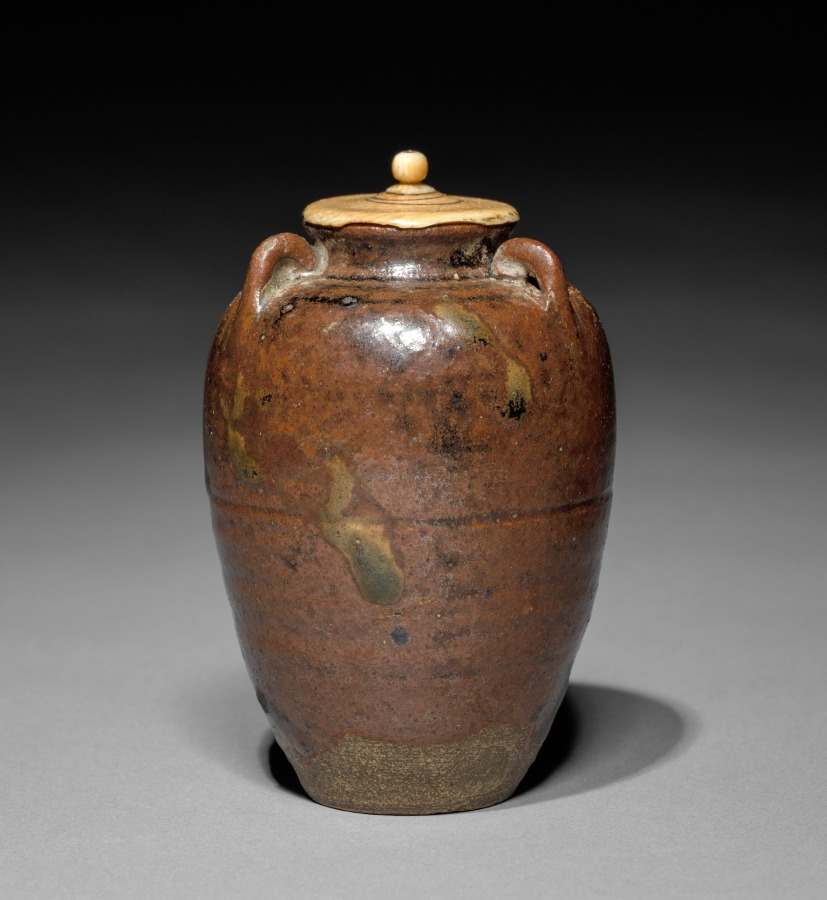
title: Tea Caddy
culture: Japan, Edo period (1615–1868)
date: 1700s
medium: porcelain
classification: Ceramic